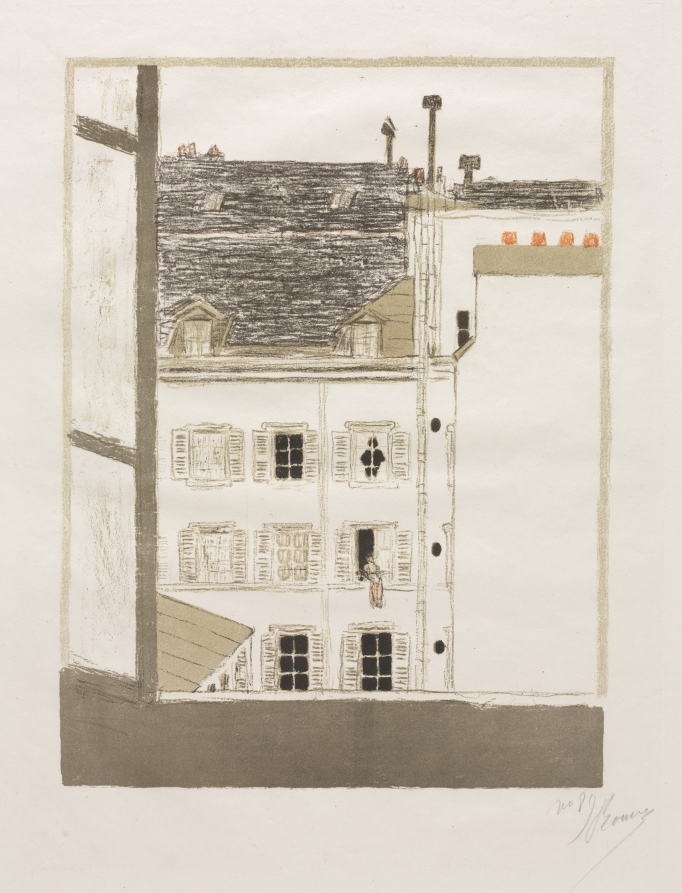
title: Houses in the Courtyard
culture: France, 19th century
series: Some Scenes of Parisian Life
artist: Pierre Bonnard (French, 1867–1947)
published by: Published by Ambroise Vollard; Printed by Auguste Clot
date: 1899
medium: color lithograph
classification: Print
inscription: numbered, lower right, in graphite: no. 8 signed, lower right, in graphite: P Bonnard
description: This suite of color lithographs collected Pierre Bonnard’s observations of city life, ranging from animated street scenes to distant observations glimpsed from the artist’s Montmartre studio window. Rather than memorializing the famous monuments of Paris, Bonnard preferred to depict small neighborhood scenes populated by urbanites shopping and strolling and by vendors selling their wares. The setting for one of the prints is the second-largest public park in Paris, the Bois de Boulogne, which was a popular place for families to relax, stroll, and enjoy carriage rides around the lakes. Two prints are nocturnal scenes in which gaslight emanating from shop windows is reflected on the wet streets, creating passages of bright yellow in the otherwise dark compositions. Bonnard’s favorite subjects, such as the Parisienne—a young, fashionable, modern woman—as well as children and dogs, appear repeatedly throughout the prints in the suite.